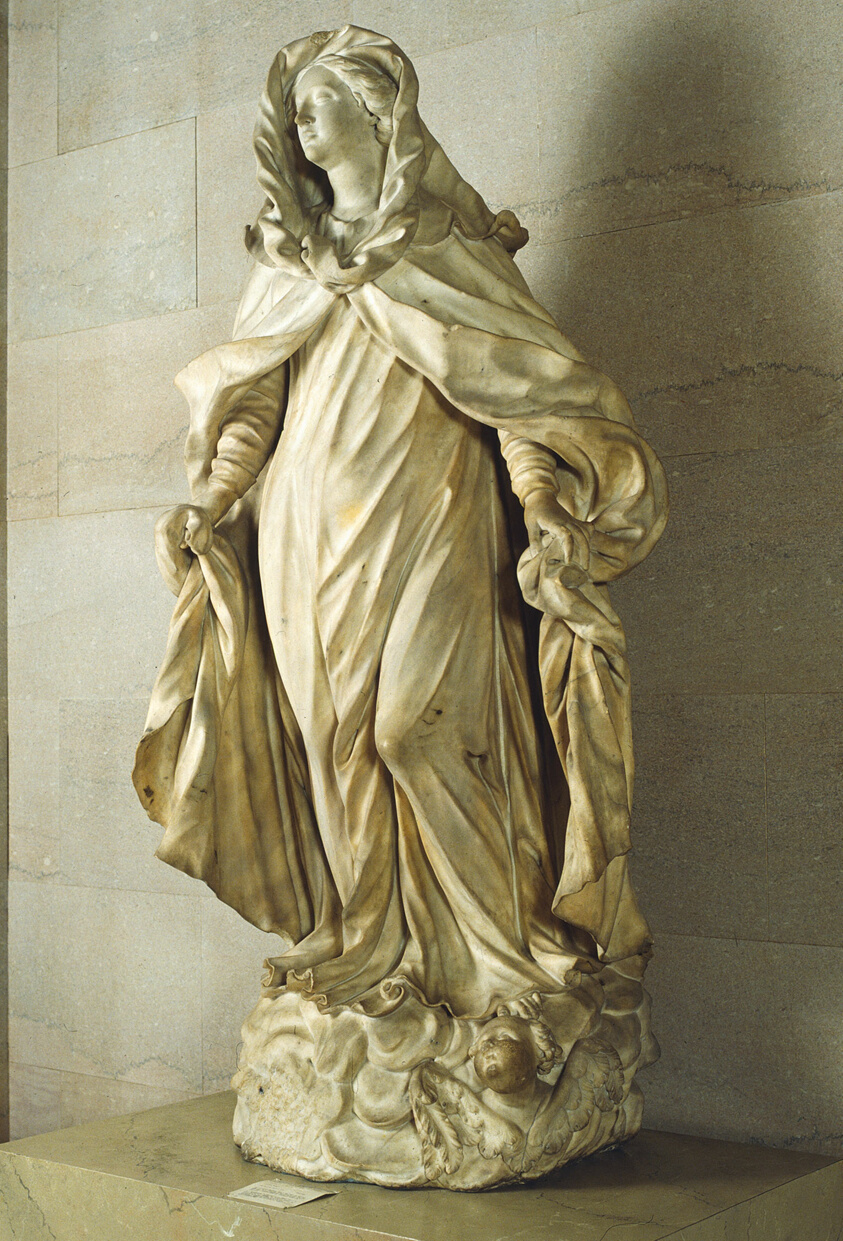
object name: Sculpture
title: Madonna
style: 18th Century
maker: Northern Italian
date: 1700/10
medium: Marble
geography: Venice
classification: sculpture; Italian; carving; marble; large scale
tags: Madonna, Christian subjects, Christianity, religion, religious, religious figures, sculpture